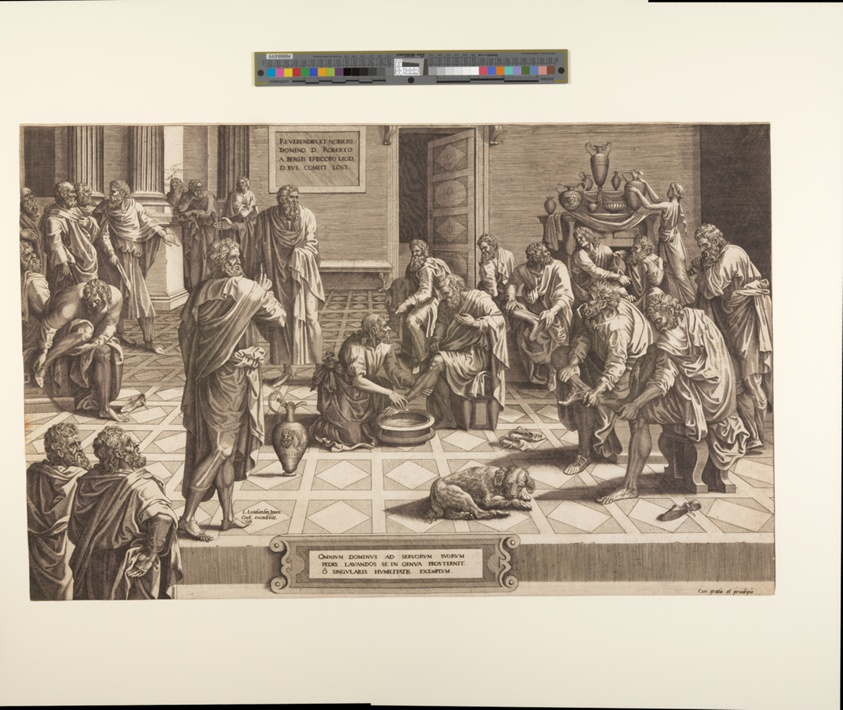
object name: Print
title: Christ Washes the Feet of the Apostles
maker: Hans Collaert I (Flemish, c. 1530–1581); after Lambert Lombard (Flemish, 1505–1566)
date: c. 1557-64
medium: Engraving on ivory laid paper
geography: Flanders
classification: engraving; paper; print; prints and drawing